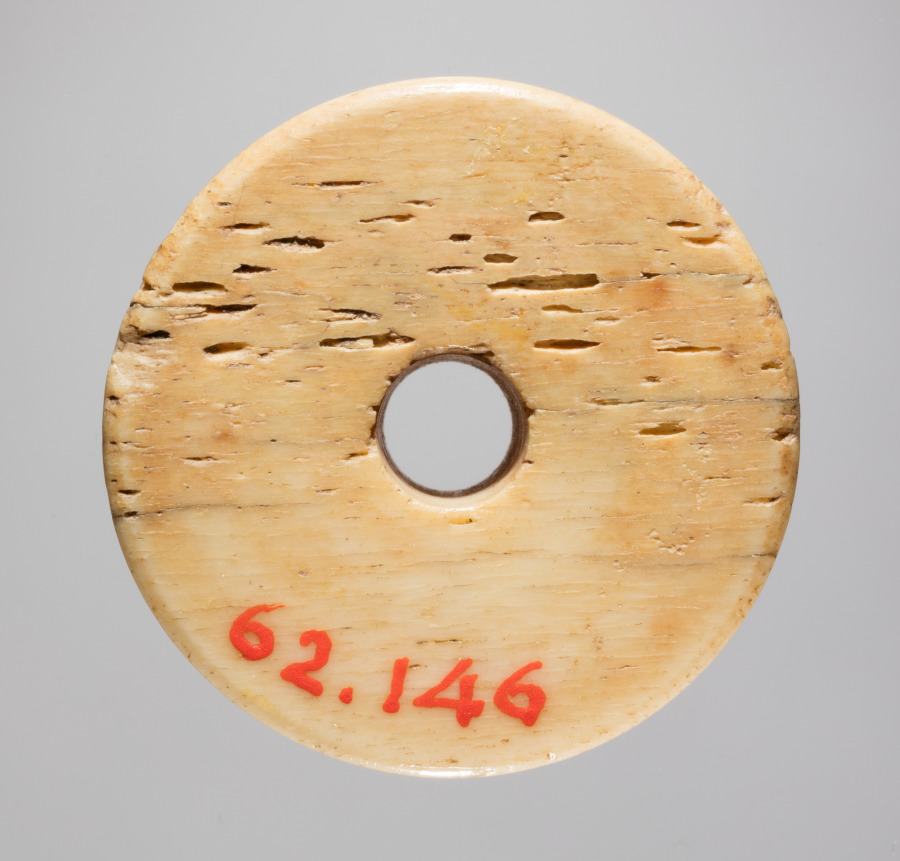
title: Spindle Whorl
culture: Iran, early Islamic period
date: 700s - 900s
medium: bone, incised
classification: Spindle Whorl